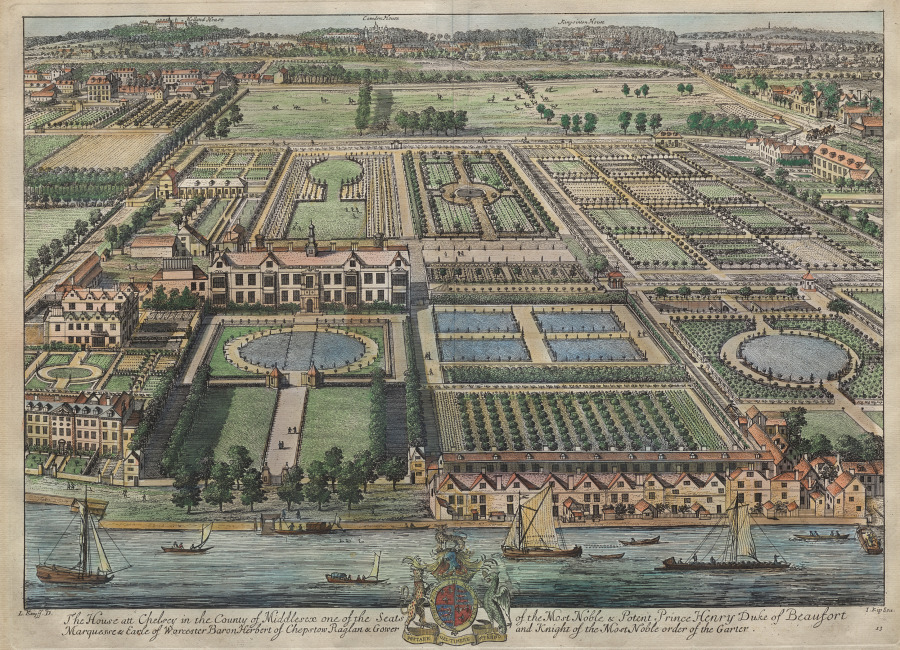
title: Beaufort House, Chelsea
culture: Netherlands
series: Britannia Illustrata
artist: Johannes Kip (Dutch, 1653–1722)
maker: after Leendert Knijff (Dutch, 1650–1721)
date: 1707–9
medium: etching and engraving, hand colored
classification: Print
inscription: In pencil, recto, lower left: "Double page illustration In/Old London [illegible] by Gladys Taylor"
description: This detailed view of Beaufort House in Chelsea portrays the gabled house, built in 1521, and its extensive formal gardens. Part of a large folio publication of the principal seats of the nobility in England, the Britannia Illustrata, it portrays a structure that was once the home of Sir Thomas More and that was demolished in 1740. The two Dutch artists who collaborated on this and the other topographical views in the volume, both resident in England, were exacting in their depictions of the architecture and gardens, providing valuable insight to the land and buildings of the time.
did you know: The house and gardens portrayed in this hand-colored engraving were destroyed in 1740.